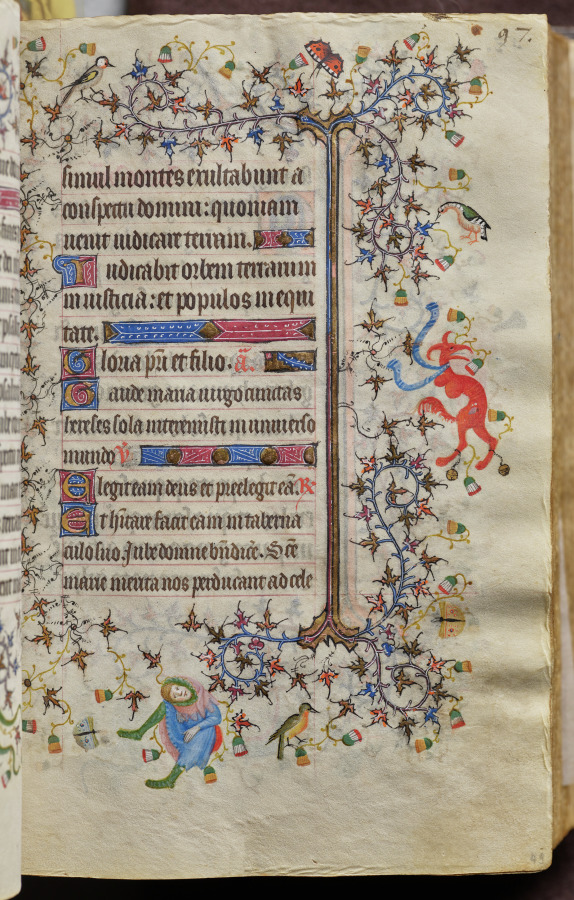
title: Hours of Charles the Noble, King of Navarre (1361-1425): fol. 49r, Text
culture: France, Paris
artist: Master of the Brussels Initials and Associates (French)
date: c. 1405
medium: ink, tempera, and gold on vellum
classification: Bound Volume